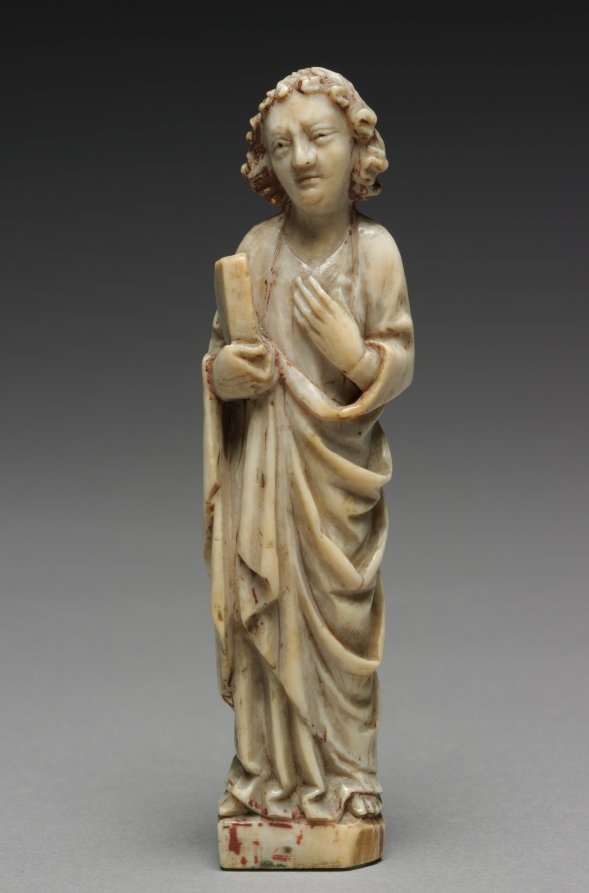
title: Saint John the Evangelist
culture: Germany or Moravia, 14th century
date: c. 1325–1330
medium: ivory with traces of paint and gilding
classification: Ivory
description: This figure with a Virgin and Crucified Christ (now lost) formed a Crucifixion group within a shrine.